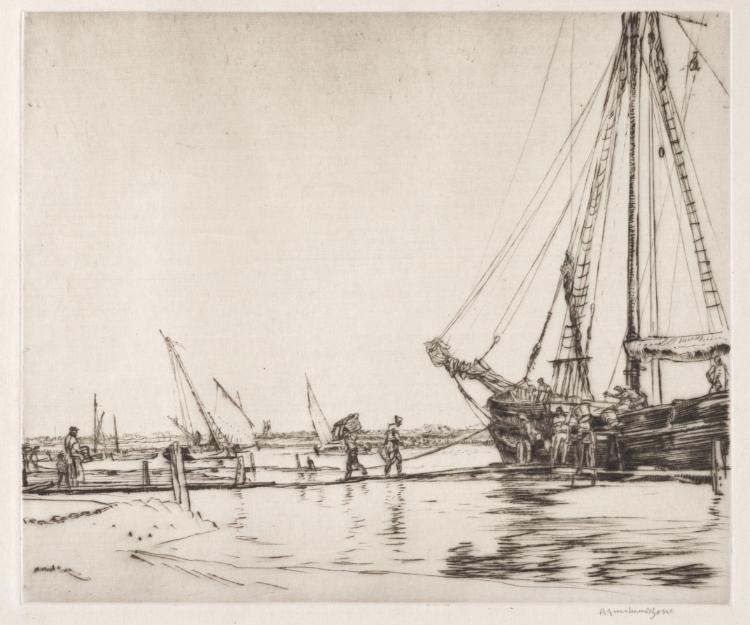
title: Moy, Ireland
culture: England, 20th century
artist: Muirhead Bone (British, 1876–1953)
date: 1913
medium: drypoint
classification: Print